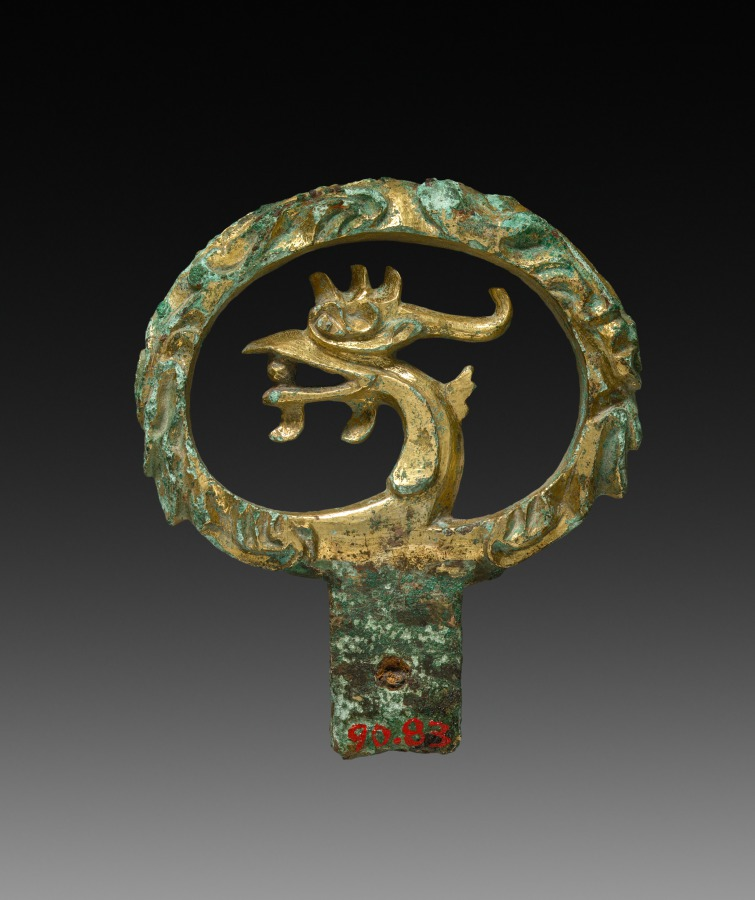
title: Sword-hilt with Phoenix Head Ring Pommel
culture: Japan, Kofun period (300–710 CE)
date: 500s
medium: gilt bronze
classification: Metalwork